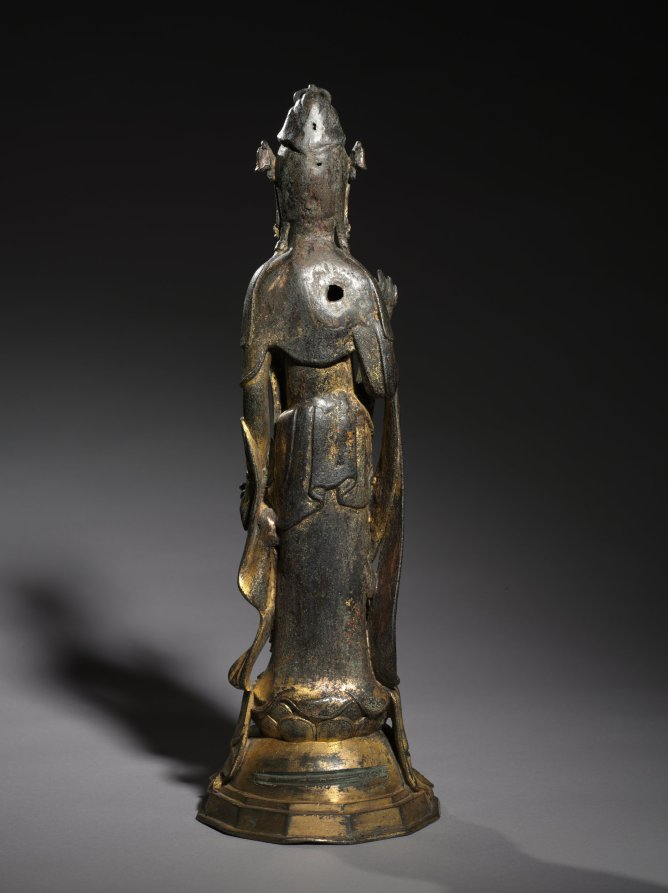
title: Bodhisattva Guanyin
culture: China, Liao dynasty (916-1125)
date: 900s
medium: gilt bronze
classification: Sculpture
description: In Buddhism, a bodhisattva is a being who, just before reaching enlightenment, turns back to assist others to reach enlightenment first. This bodhisattva holds his hand palm forward, in a gesture that tells followers not to fear. In his other hand he carries a bottle that holds the elixir of immortality.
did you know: The Liao rulers were devout Buddhists who commissioned substantial religious projects.